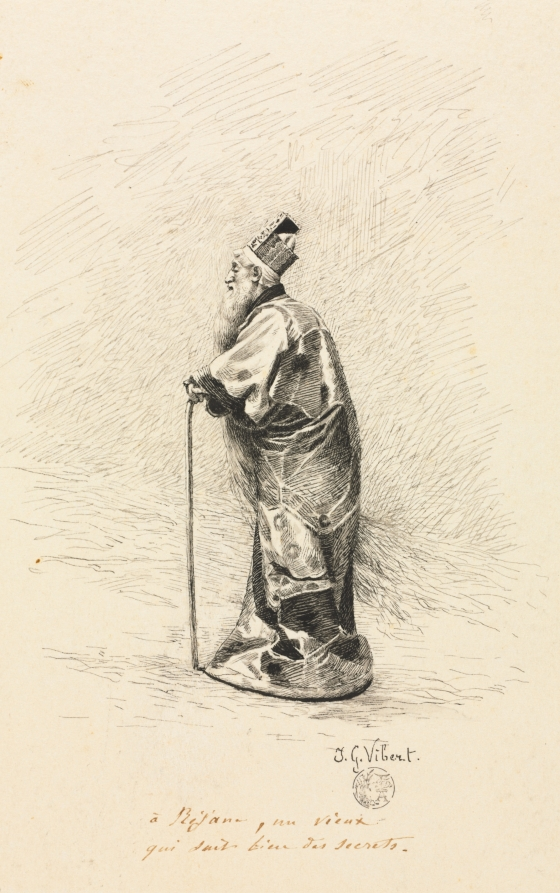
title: Study for the Magician in "Conte de Fée" (Story of a Fairy)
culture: France, 19th century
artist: Jehan-Georges Vibert (French, 1840–1902)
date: 1800s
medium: black ink (pen and wash)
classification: Drawing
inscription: Signed lower right in black ink: J. G. Vibert Inscribed lower center, in brown ink: à Réjane, une vieux / qui sait bien des secrets